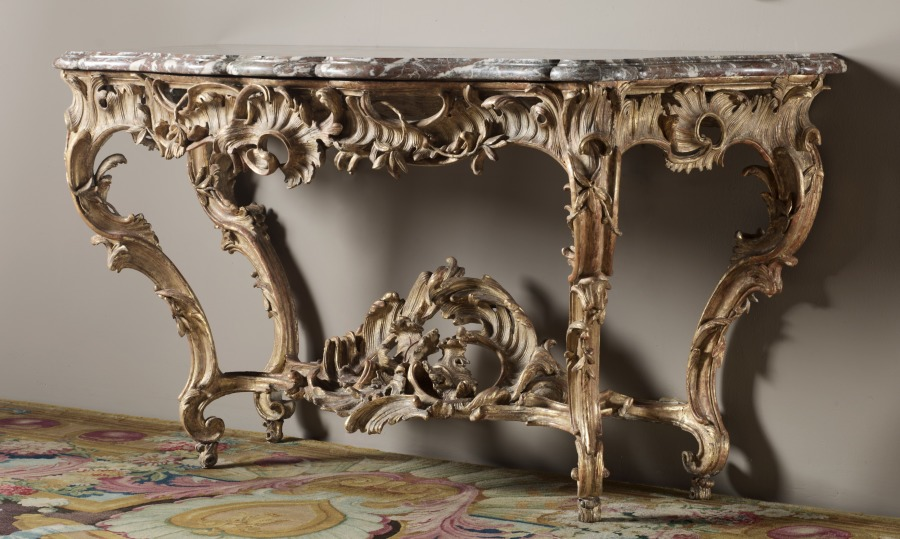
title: Console Table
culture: France, mid-18th Century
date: c. 1730– 1740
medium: gilt wood, marble top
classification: Furniture and woodwork